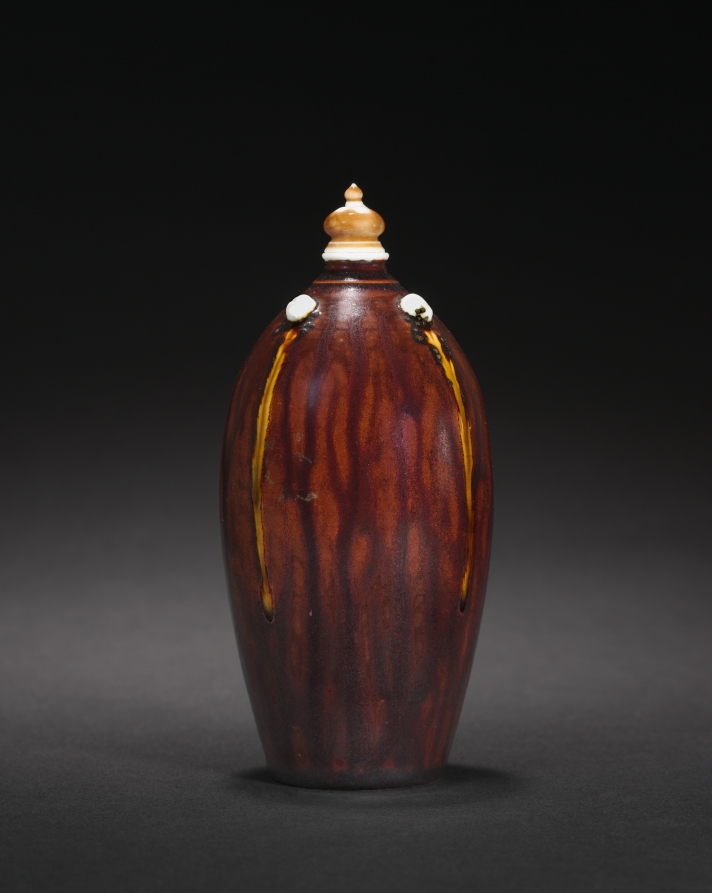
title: Covered Vase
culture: France, 20th century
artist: Sèvres Porcelain Factory (French, est. 1756)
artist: Taxile Maximin Doat (French, 1851–1939)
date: 1901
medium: porcelain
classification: Ceramic